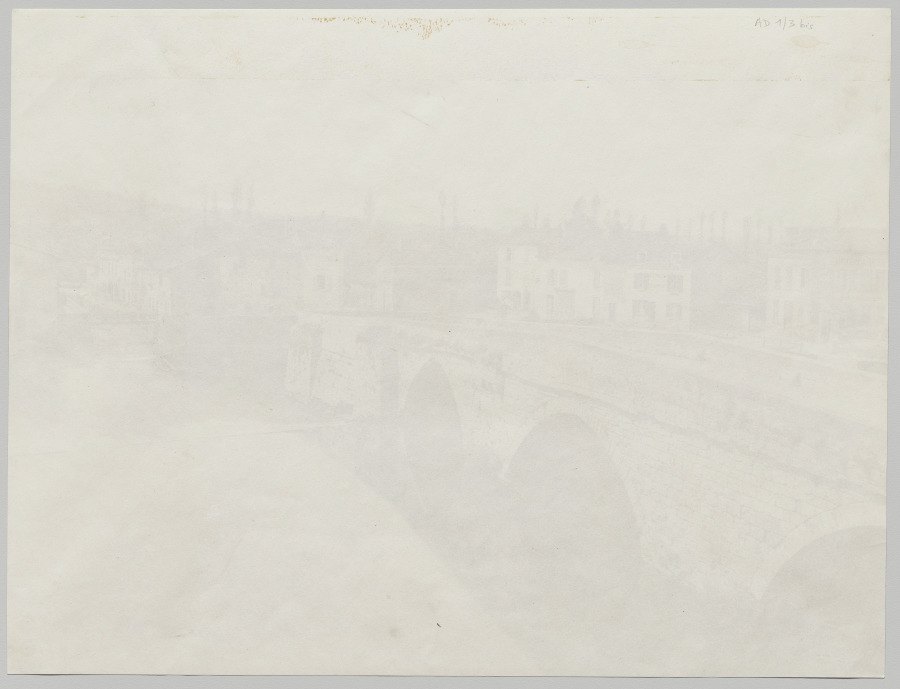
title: Périgueux. The Tournepiche Bridge, upstream side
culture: France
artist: Édouard Baldus (French, 1813–1889)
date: 1860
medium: albumenized salt print from a paper negative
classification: Photograph